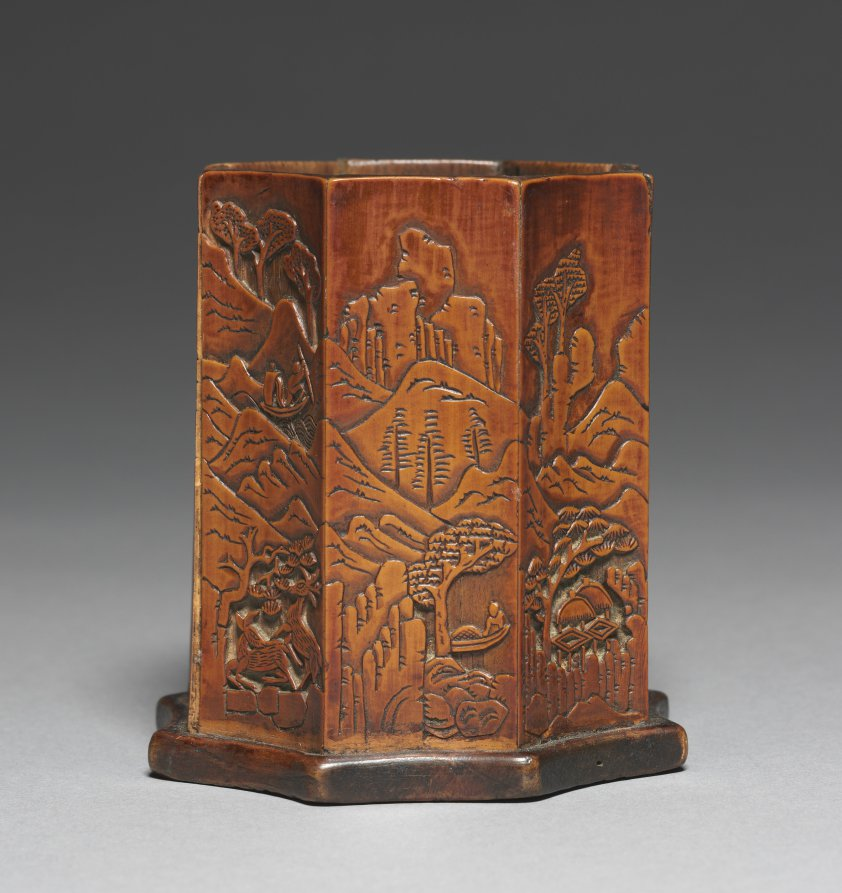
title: Brush Holder with Bamboo and Landscape Design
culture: Korea, Joseon dynasty (1392–1910)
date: 1800s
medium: carved bamboo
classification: Wood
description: An 18th-century Korean collector Yu Man-joo (1755–1788) wrote that “spending money on luxury clothing, dishes, and decorations for the home is a waste, but acquiring fancy writing tools helps to develop elegant taste and high-mindedness.” Inspired by aesthetic discourses on elegance versus vulgarity in late Ming Chinese literature, Korean collectors in the late 1700s and 1800s strove to assemble objects that would display their intellect and sophisticated taste. Stationery objects in particular—printed books, finely crafted brushes, brush holders, ink stones, water droppers, stone wares with grayish-white crackled glazes as well as bronze vessels, and incense burners—were all objects that reflected pure and elegant taste.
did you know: Stationery objects such as this brush holder were highly appreciated among scholars, not only for their function, but for their aesthetic.